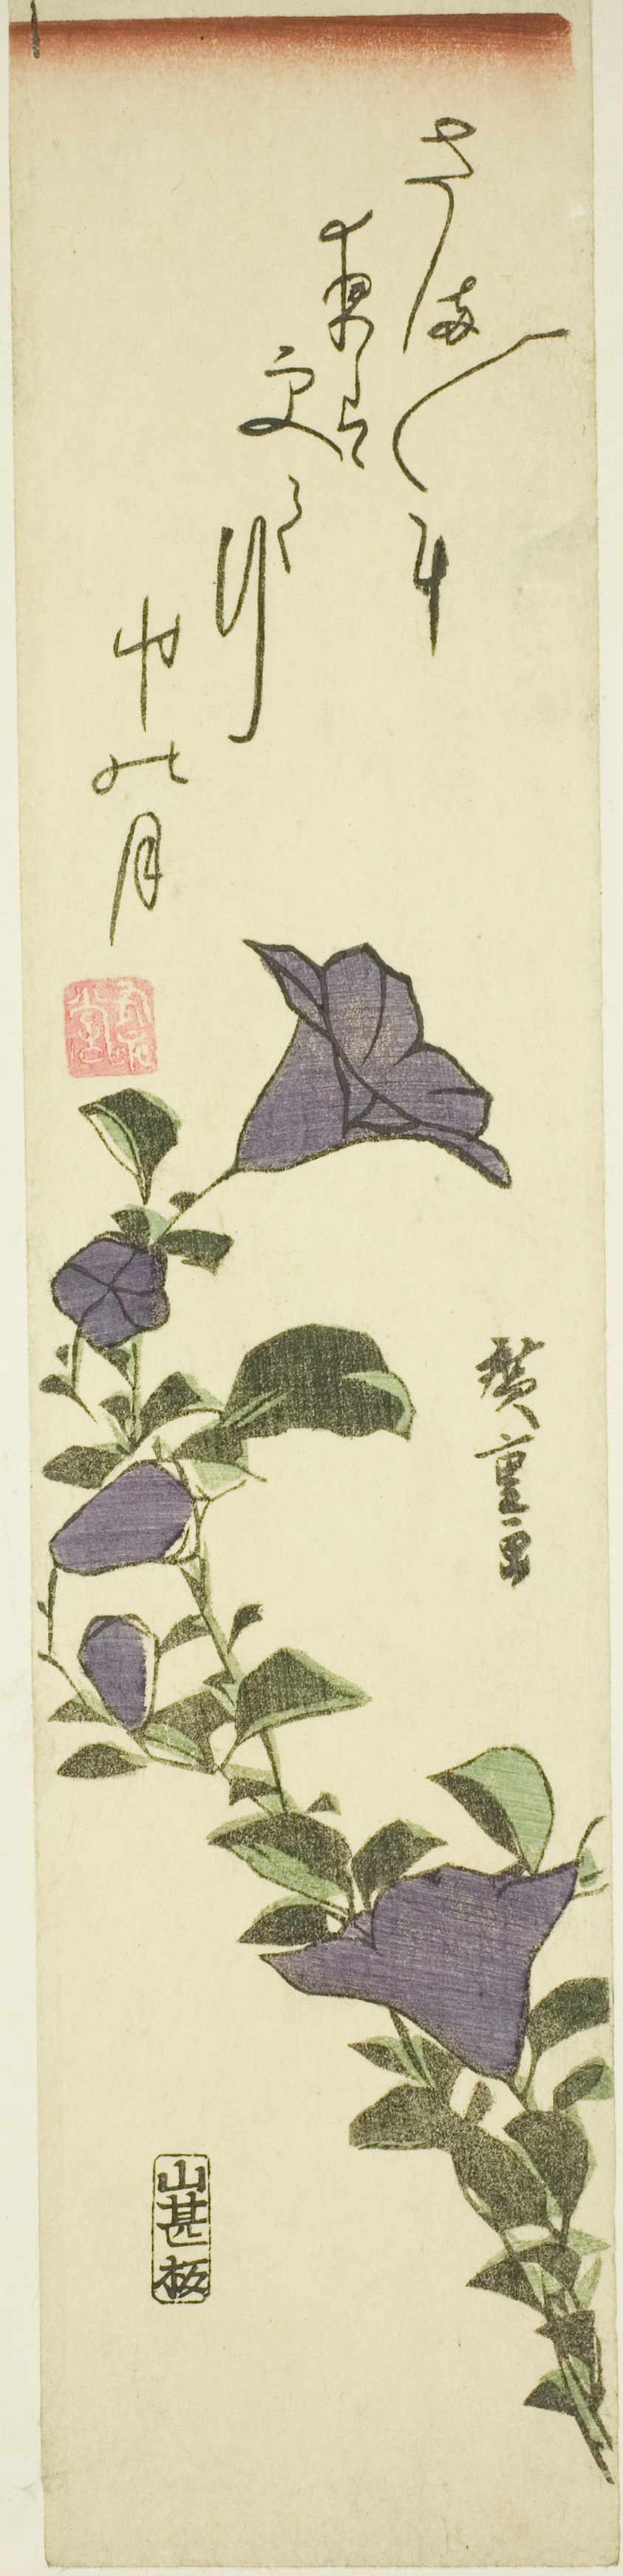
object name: Print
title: Chinese Bell Flowers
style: Japanese (culture or style)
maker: Utagawa Hiroshige 歌川 広重; Japanese, 1797-1858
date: c. 1830s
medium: Color woodblock print; tanzaku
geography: Japan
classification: woodblock print; print; asian art